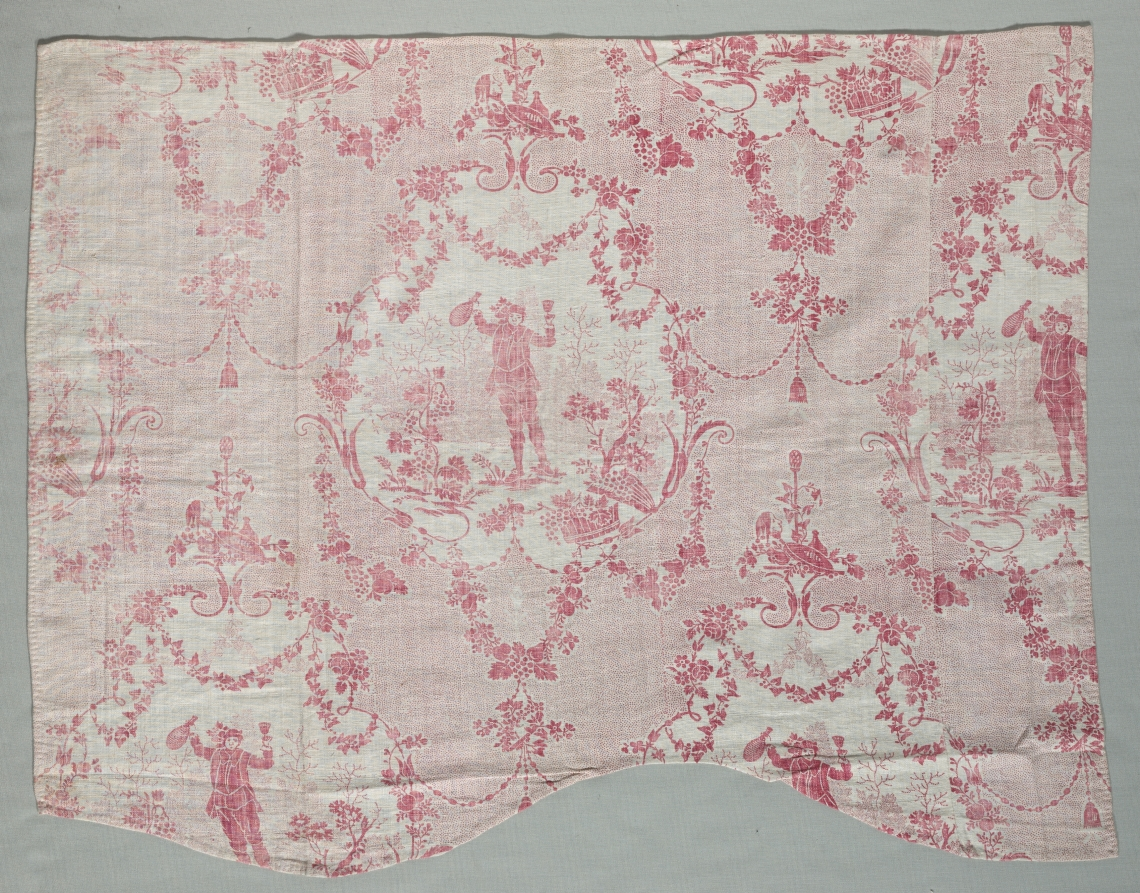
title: Fragment of Woodblock Printed Cotton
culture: France, Jouy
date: c. 1770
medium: woodblock print on cotton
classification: Textile